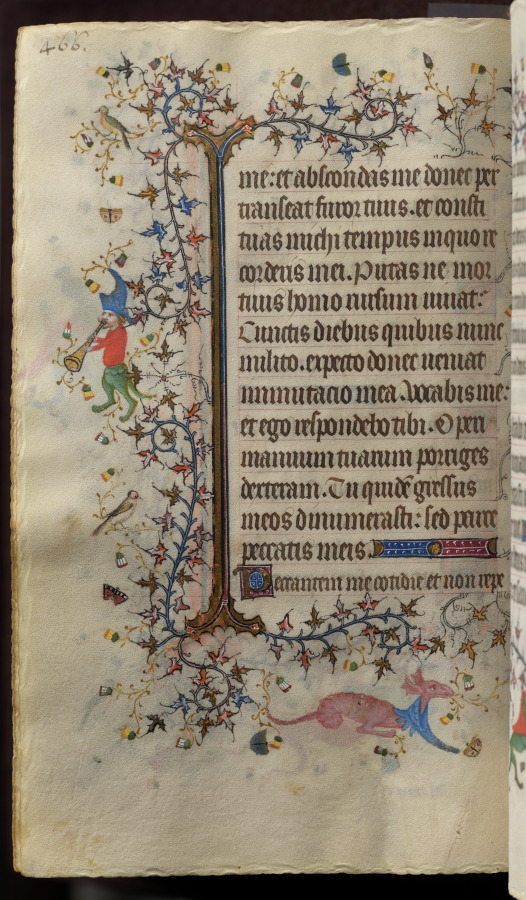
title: Hours of Charles the Noble, King of Navarre (1361-1425): fol. 227v, Text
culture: France, Paris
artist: Master of the Brussels Initials and Associates (French)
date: c. 1405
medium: ink, tempera, and gold on vellum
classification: Bound Volume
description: This precious volume was obviously highly prized by its owner, the French-born King of Navarre, who had his coat of arms painted on no less than twenty folios. Rather than directly commissioning this manuscript from a specific workshop, it seems that Charles the Noble acquired his book of hours -- perhaps ready-made for the luxury market -- while on a trip to Paris in 1404-05. A collaborative effort, six painting styles are evidenced within the pages of this codex, those of two Italians, two Frenchmen, and two Netherlanders. The painter who was responsible for the planning and decoration of the book, and who produced seventeen of the large miniatures, was a Bolognese artist known as the Master of the Brussels Initials. His principal assistant, responsible for most of the borders, was a Florentine who signed his name "Zecho" da Firenze on folio 208 verso.